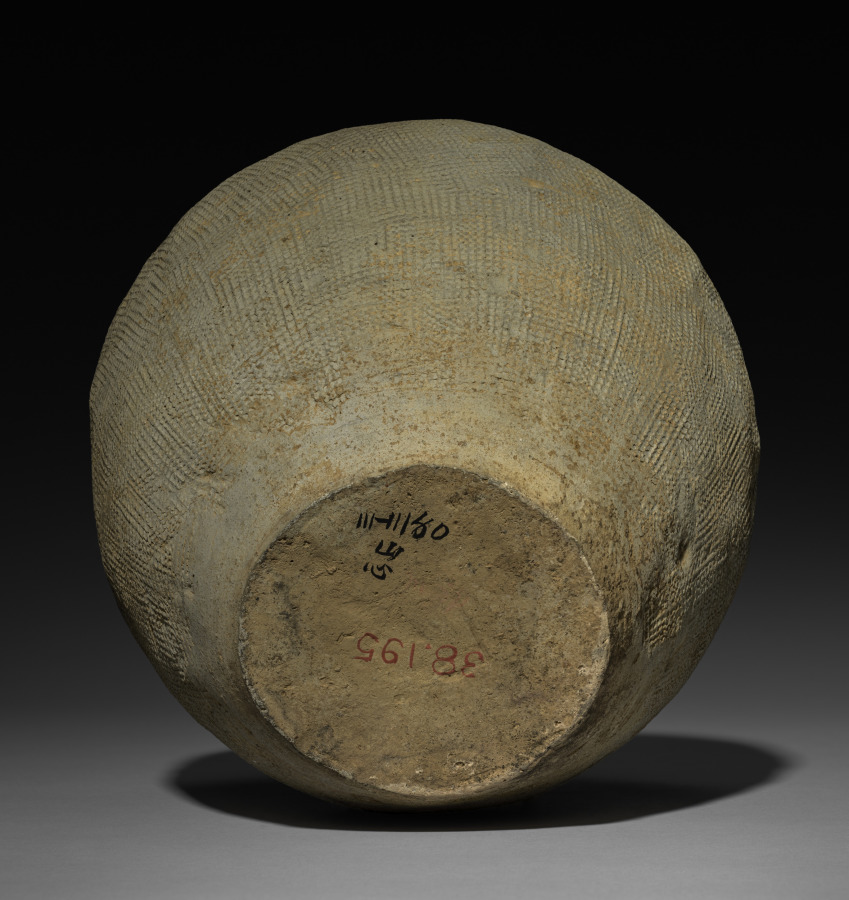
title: Jar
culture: China, Hunan province, reportedly Changsha, Eastern Zhou dynasty (770–256 BCE), Warring States period (475–221 BCE)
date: 481–221 BCE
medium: earthenware with stamped decoration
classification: Ceramic